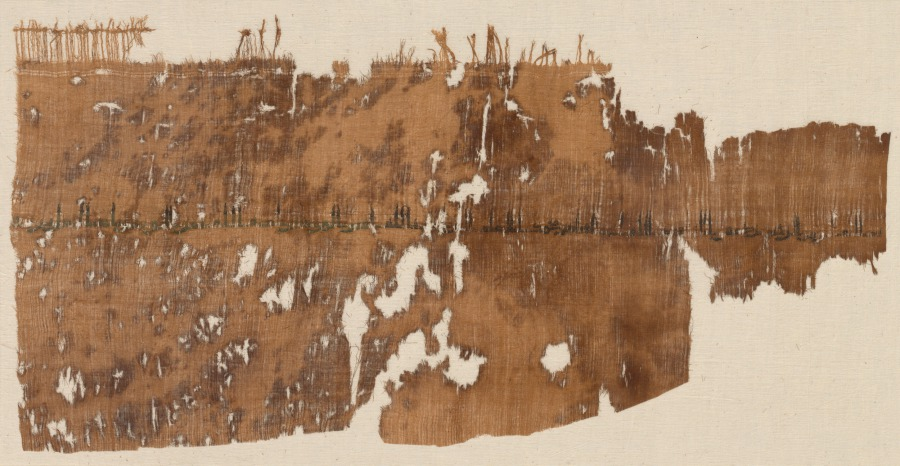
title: Fragment of a Tiraz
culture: Egypt, Ikhshidid period, Caliphate of al-Radi, AH 323-328 (A.D. 934-940)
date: 934 – 940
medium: tabby ground with inwoven tapestry inscription; linen and silk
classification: Textile